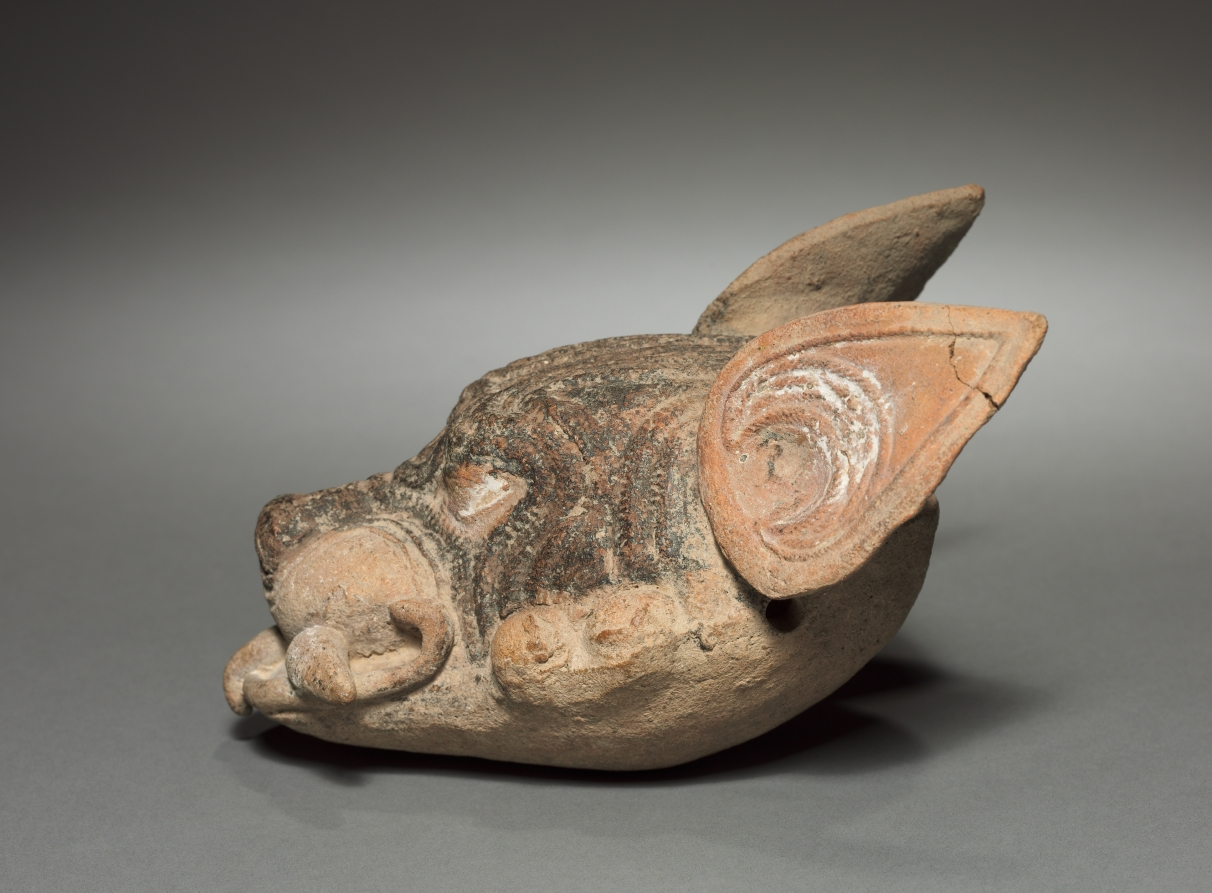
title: Dog Head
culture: Mexico, Gulf Coast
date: 500–1000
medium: earthenware, asphalt and resin paint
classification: Sculpture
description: This dog's snarl and protruding fangs lend him a sinister expression. Although pierced for suspension, the head seems too large and fragile to have been a pendant. Press-molds, used to create the dog's face and ears, were commonly used in the Gulf Coast region, where asphalt occurs naturally and was applied to pottery as a paint after firing.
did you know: This ceramic was analyzed using thermoluminescence dating; it was fired between 900 and 1,500 years ago.